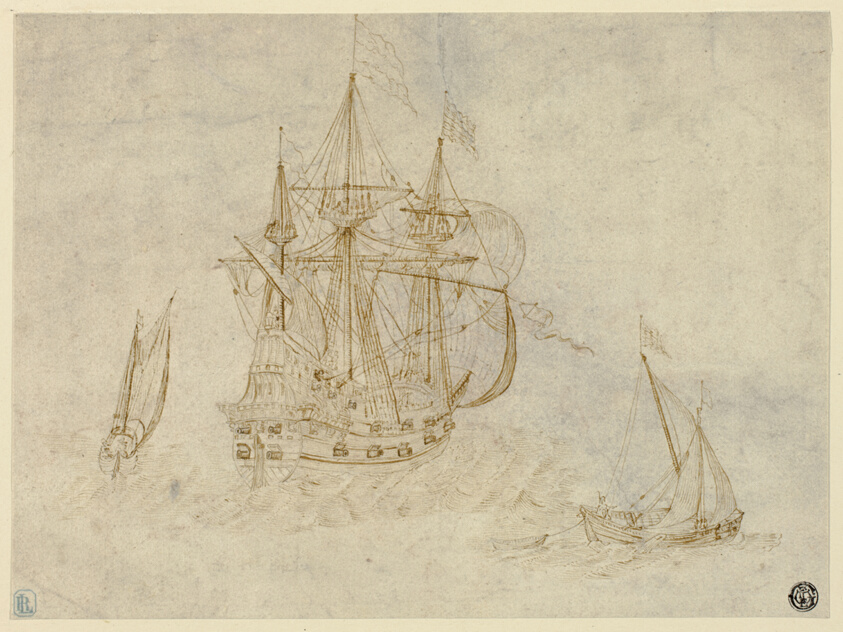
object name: Drawing and Watercolor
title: Three Ships at Sea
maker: Possibly School of Pieter Bruegel, the elder; Flemish, 1525/30–1569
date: c. 1600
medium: Pen and brown ink on ivory laid paper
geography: Netherlands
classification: pen and ink drawings; drawings (visual works); prints and drawing